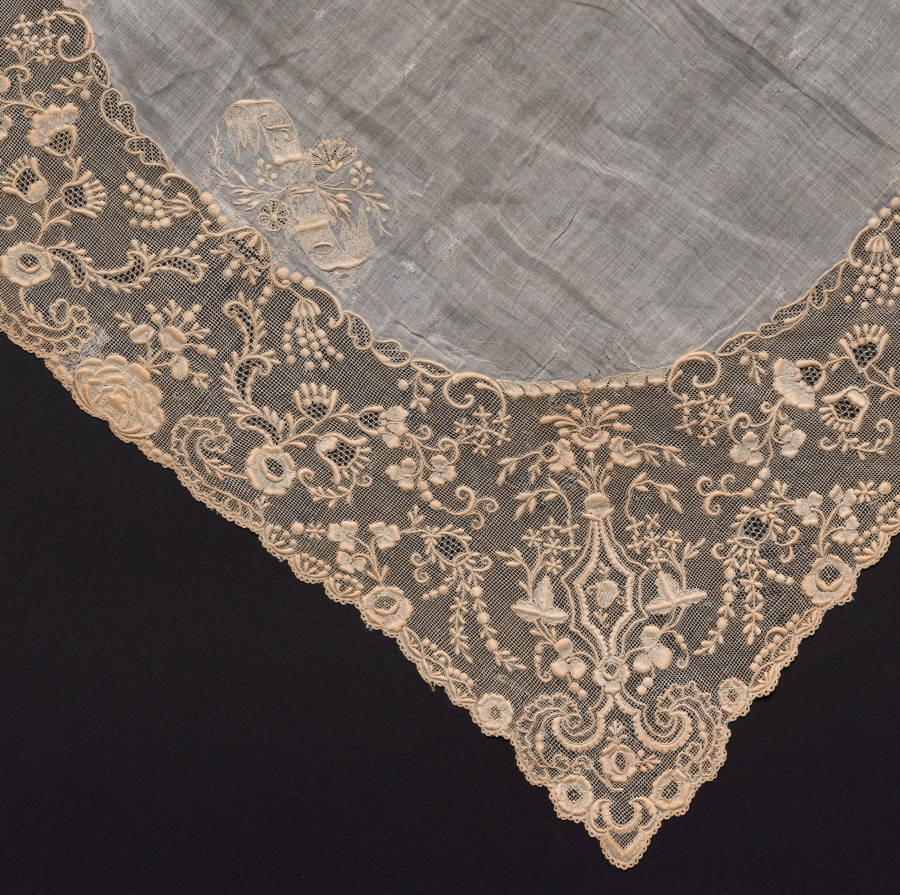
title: Lace Handkerchief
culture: France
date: 1800–1825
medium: Plain weave linen center: needle lace (drawnwork) edging and embroidery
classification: Embroidery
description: The initials N. de O. are embroidered in one corner of this handkerchief.